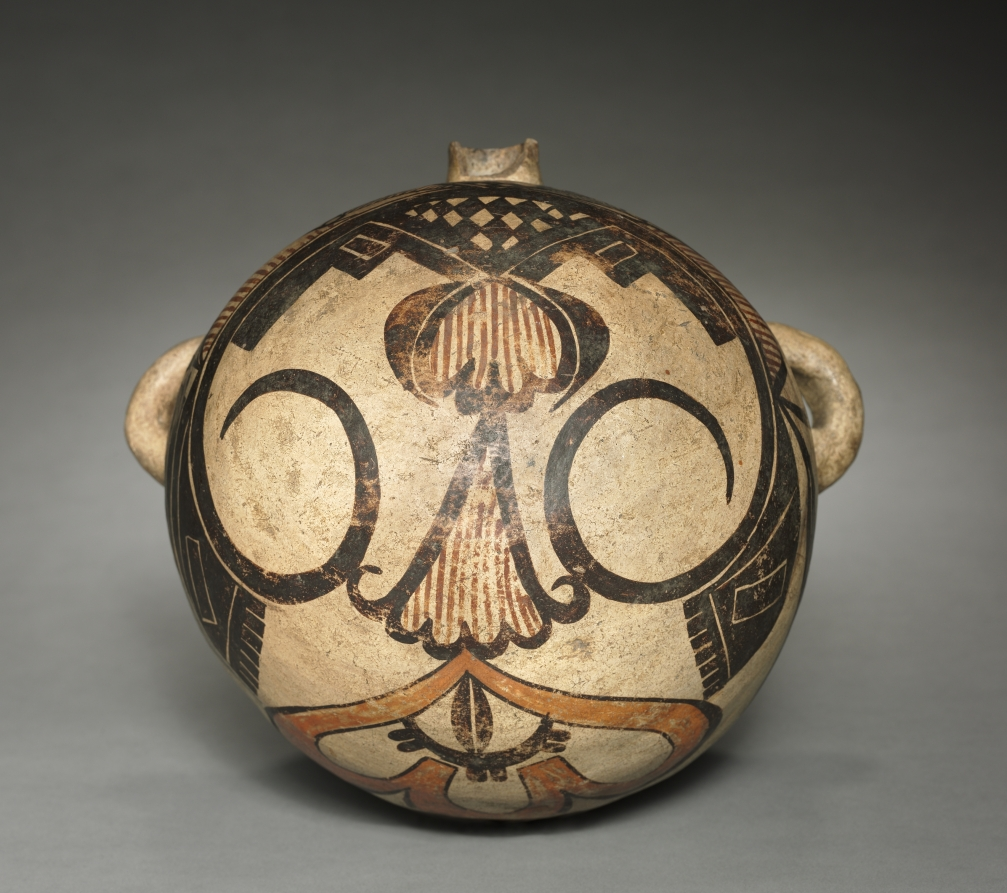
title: Canteen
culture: Native North America, Southwest, Arizona, Pueblo, Hopi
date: 1870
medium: ceramic, slip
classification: Ceramic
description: Since the 1500s, Hopi women made big-bellied canteens, based on Spanish prototypes, and used them to carry water. By the late 1800s, canteens became popular with Euro-American tourists, who increasingly flocked to the Southwest in search of encounters with “exotic” Native American cultures. Thus, Hopi artists embellished their wares to improve their appeal, here with graceful abstract forms.